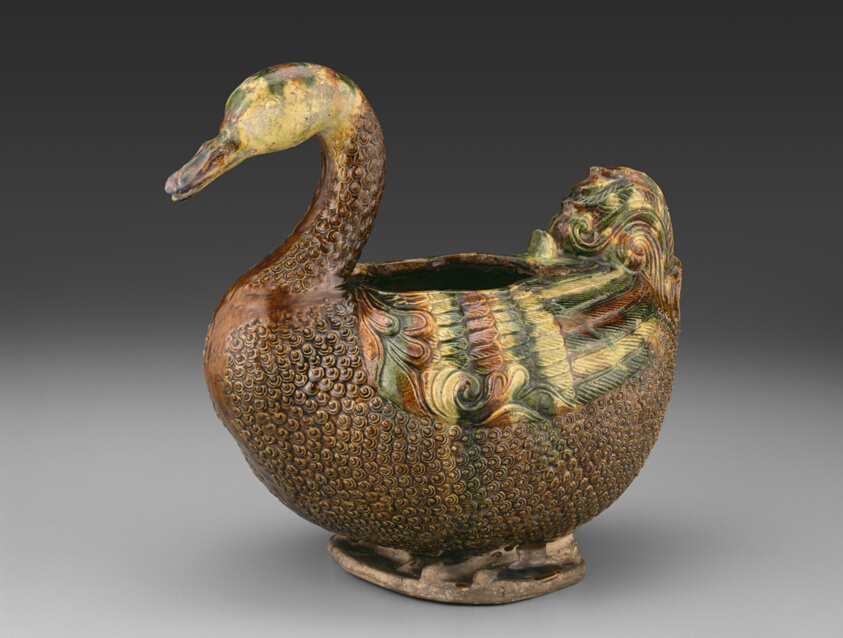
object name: Vessel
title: Vessel in Form of a Bird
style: Chinese (culture or style)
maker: China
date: Tang dynasty (618–907), first half of 8th century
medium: Earthenware with three-color (sancai) lead glazes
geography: China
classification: vessel; earthenware; ceramics; asian art